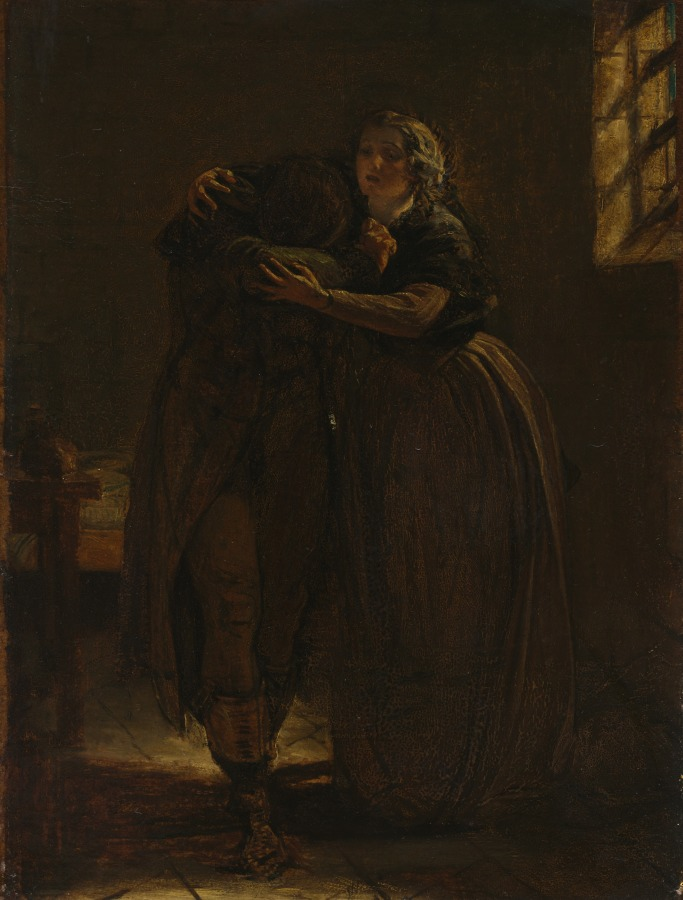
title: Study for "Come Rest in this Bosom my own Stricken Dear"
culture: England, 19th century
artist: Augustus Leopold Egg (British, 1816-c. 1863)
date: 1800s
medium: oil on board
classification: Painting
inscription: hand-written label affixed to back: "Moore's [Irish] songs... Come rest on this bosom."